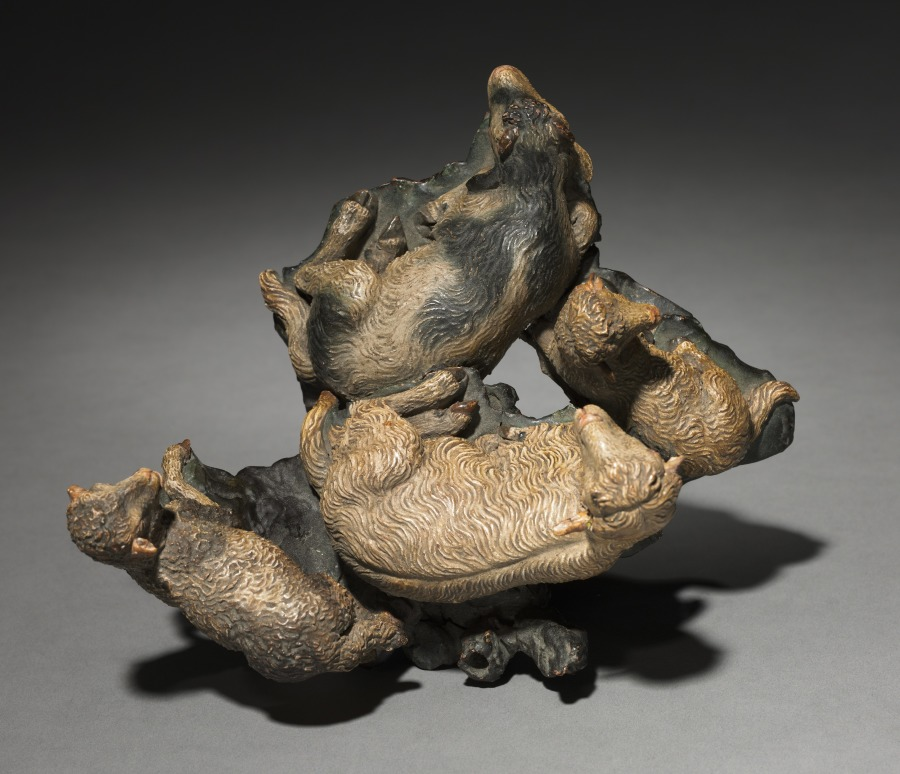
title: Figure from a Crèche: Group of Four Sheep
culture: Italy, Naples, late 18th-early 19th century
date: 1780–1830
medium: painted terracotta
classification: Sculpture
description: The practice of creating scenes of the Nativity for the home dates from the early 1700s in Italy, where people began to set up doll-like figures of about a foot or less in height. The custom was particularly popular in Naples around 1800, where crèche scenes (crèche means cradle, or crib) included many figures, whose heads and hands of painted terracotta, stuffed cloth bodies, and clothing adapted from contemporary local costumes gave them an amazingly realistic character. Representations of the birth of Jesus can be traced to the first few centuries of Christianity. Both living creatures and sculptural depictions of them were used from early times. By the late middle ages it was customary to create life-size figures of wood or stone, naturalistically painted, to represent the characters who participated in the events of Jesus's early life. These sculptures were then arranged in scenes illustrating one or both of the most important of these events, the Adoration of the Shepherds and the Adoration of the Magi-the three kings from the East who came to pay homage to the Christ child. Used in churches, these large figures were especially popular in Italy, Central Europe, Spain, and Portugal.